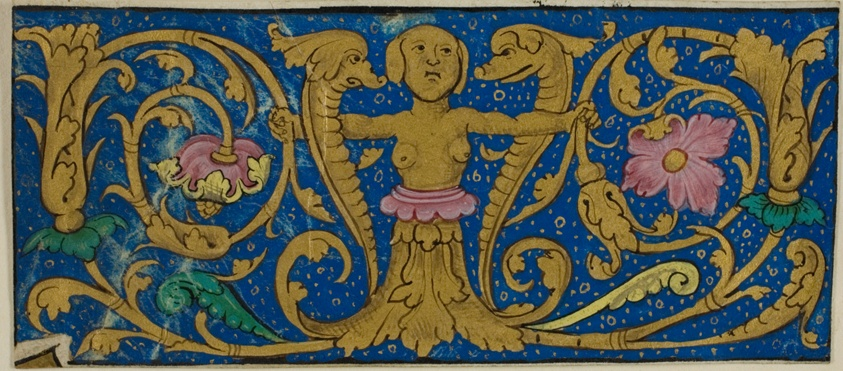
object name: Drawing and Watercolor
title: Illuminated Border with Grotesques and Flora from a Manuscript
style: medieval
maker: French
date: 15th or early 16th century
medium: Manuscript cutting in tempera and gold leaf on vellum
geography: France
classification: tempera; manuscript; drawings (visual works); prints and drawing